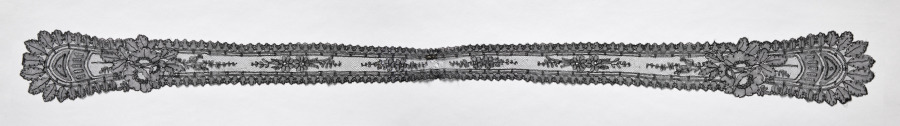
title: Lace Barb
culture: France, Chantilly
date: 1800s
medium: Cotton: machine-made lace and embroidered net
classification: Lace